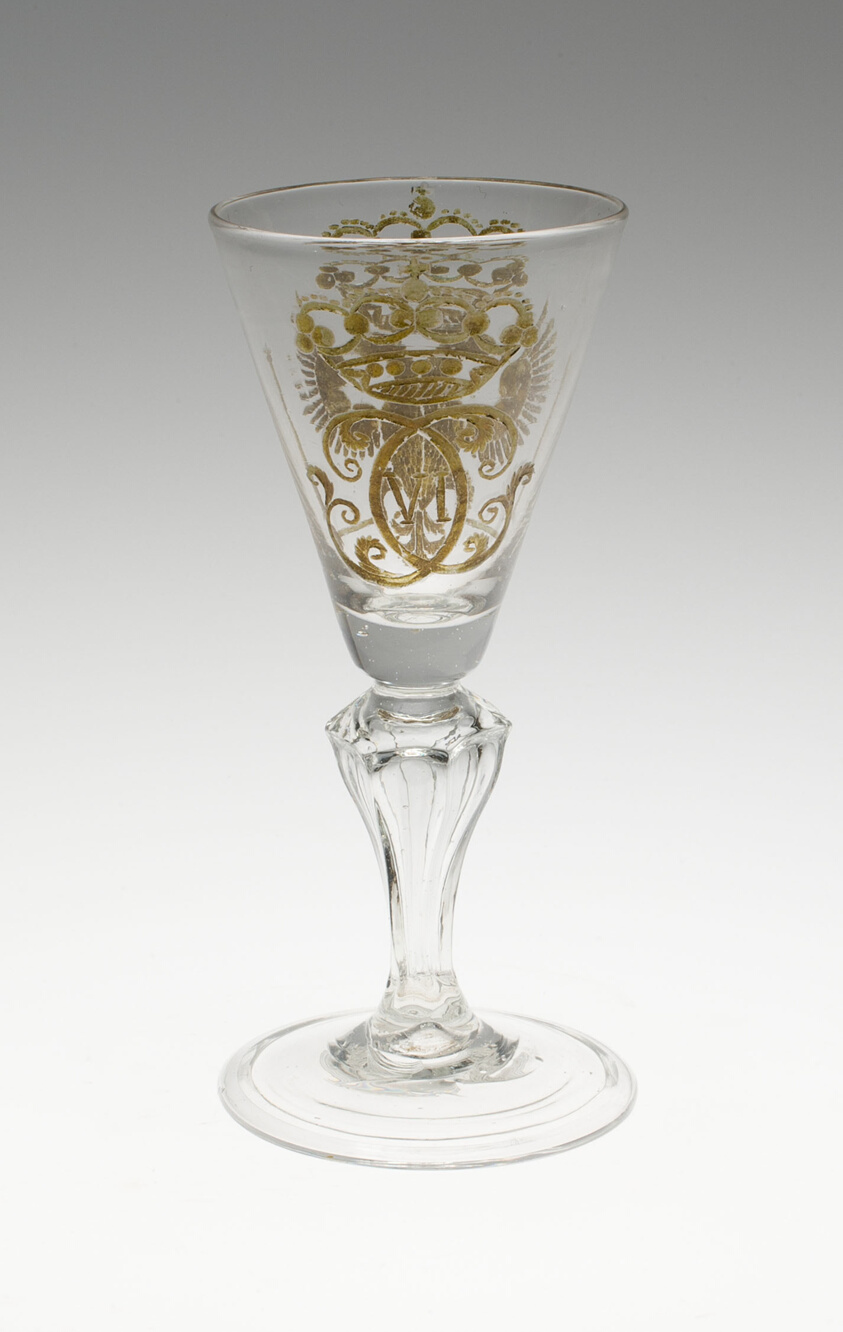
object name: Glass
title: Wine Glass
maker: Germany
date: c. 1730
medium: Glass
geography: Germany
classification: drinking vessel; glass; european decorative arts